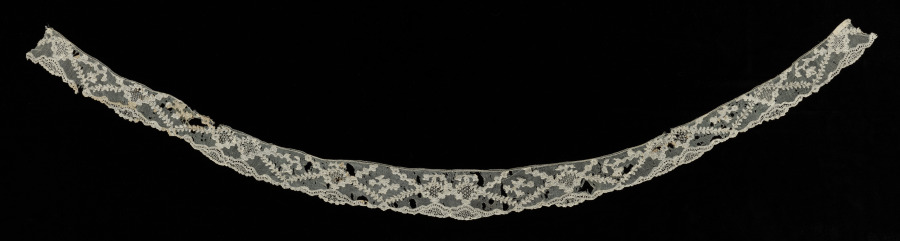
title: Lace Edging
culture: Italy, Burano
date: 1750–1800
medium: Needle lace (Burano Point)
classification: Lace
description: Although made in Italy, the style of this lace fragment is French.